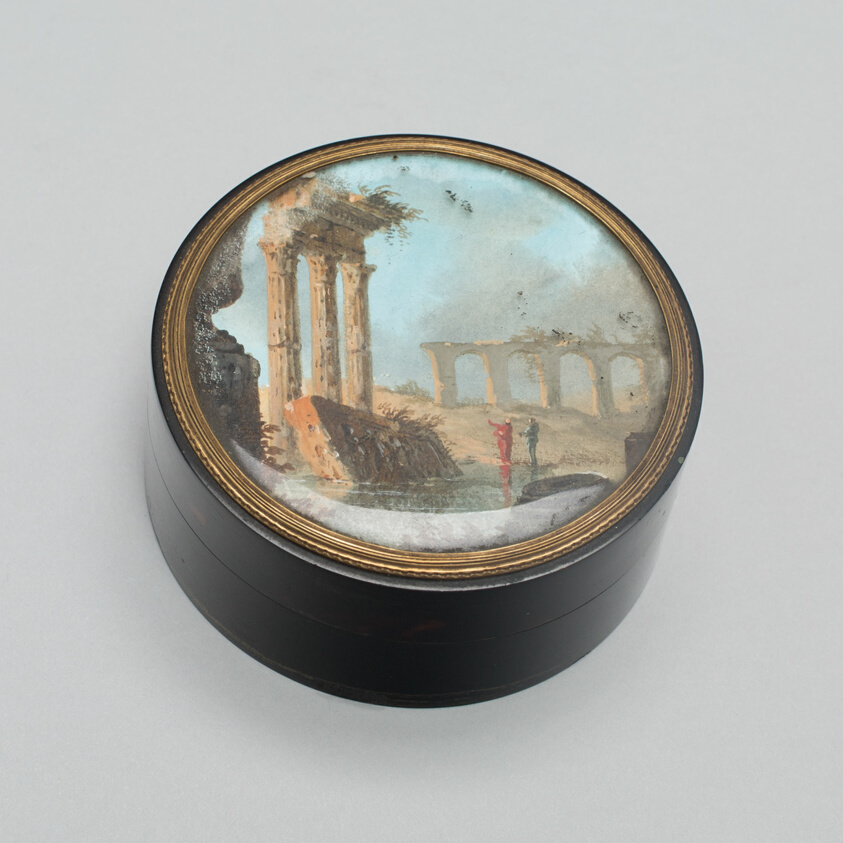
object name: Metalwork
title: Round Box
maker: Italy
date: 1775/1800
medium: Tortoiseshell, watercolor, glass, and metal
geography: Italy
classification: accessories (object genre); european decorative arts; metalwork